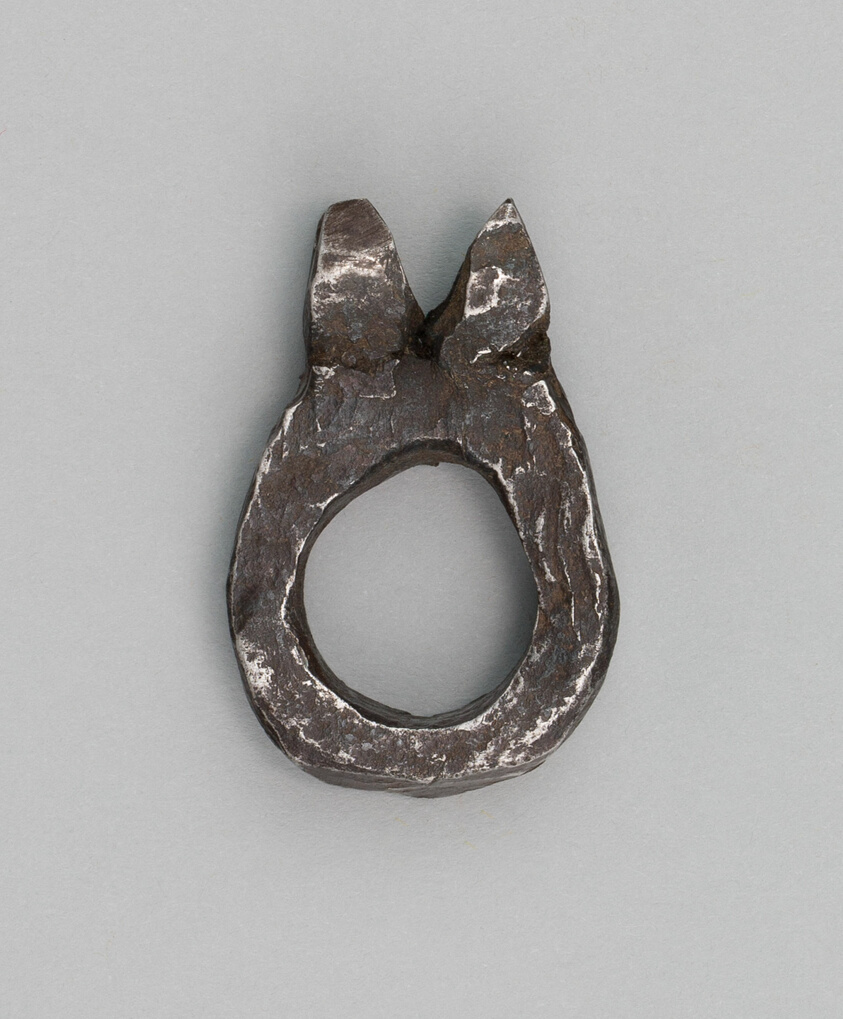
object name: Arms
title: Finger Guard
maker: European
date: 16th century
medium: Iron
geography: Europe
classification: arms and armor, miscellaneous; arms and armor; arms